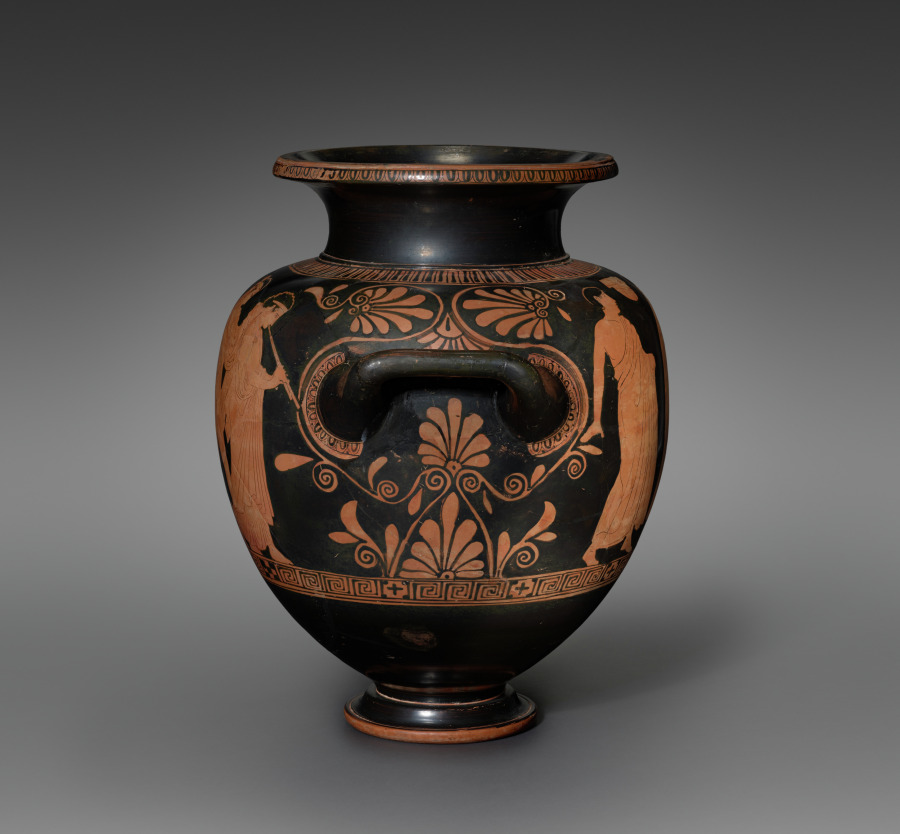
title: Red-Figure Stamnos (Mixing/Storage Vessel): Komos (Musicians and Revelers)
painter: attributed to Kleophon Painter (Greek, Attic, active c. 440–410 BCE)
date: c. 435–425 BCE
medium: Ceramic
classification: Ceramic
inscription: Κ Α Λ Ο Σ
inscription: Κ Α Λ Ο [Σ]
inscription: black '080'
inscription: black 'WF2'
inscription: black '0.19'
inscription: red '09.6'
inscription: partially removed red and white sticker, with number blacked out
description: Four lively figures move to the right across the front side of this stamnos, a vase used for storing and mixing wine. First comes a finely dressed woman playing the pipes, followed by three male figures, all nearly nude. The bearded one holds a drinking cup and reaches back, perhaps dancing, while the last in line concentrates on the music of his lyre.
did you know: The Athenian stamnos, a shape favored by the Etruscans, was made primarily for export.